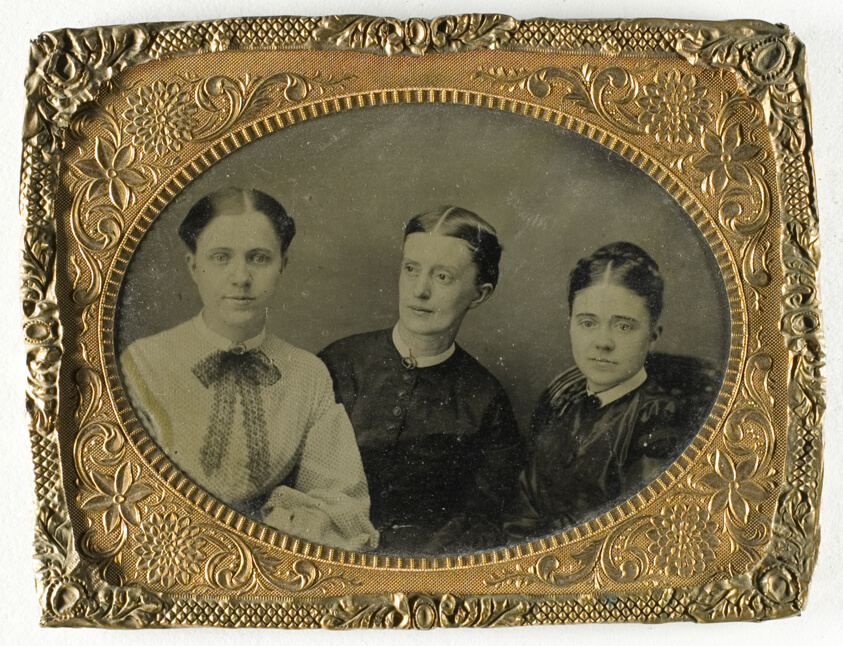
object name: Photograph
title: Untitled (Portrait of Three Women)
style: 19th century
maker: Artist unknown; 19th century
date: 1850/99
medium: Tintype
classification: photography; photograph